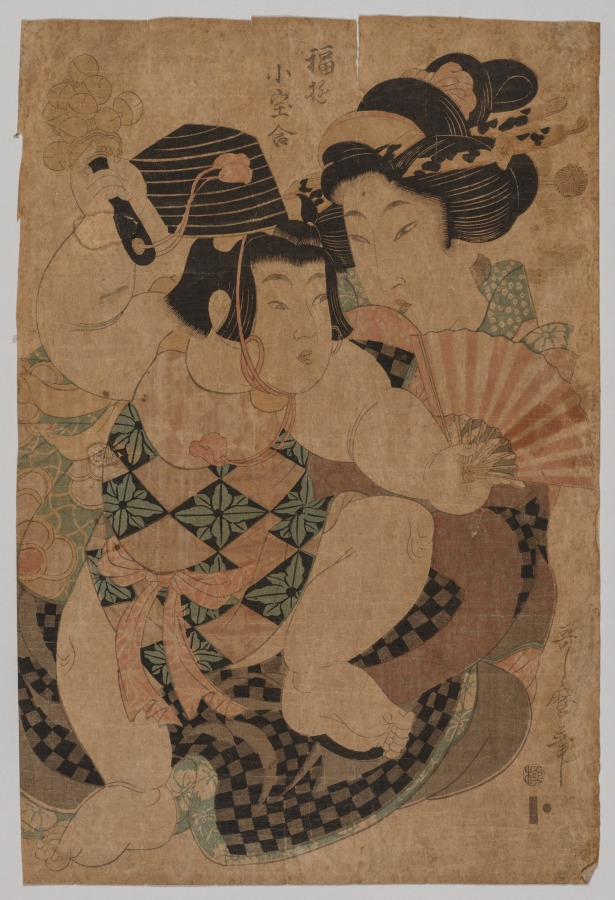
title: No Title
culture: Japan, Edo period (1615–1868)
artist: Kitagawa Utamaro (Japanese, c. 1754–1806)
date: 1753–1806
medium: color woodblock print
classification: Print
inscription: Signature: Utamaro fude